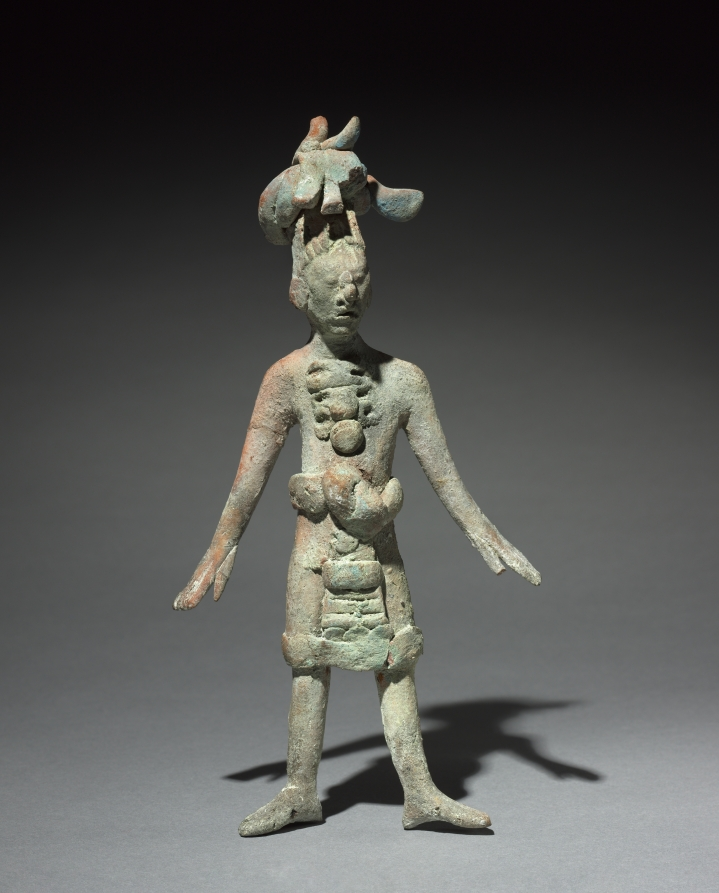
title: Jaina Figure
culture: Maya, Late Classic, 7th-8th Century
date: 600s-700s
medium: terracotta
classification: Sculpture